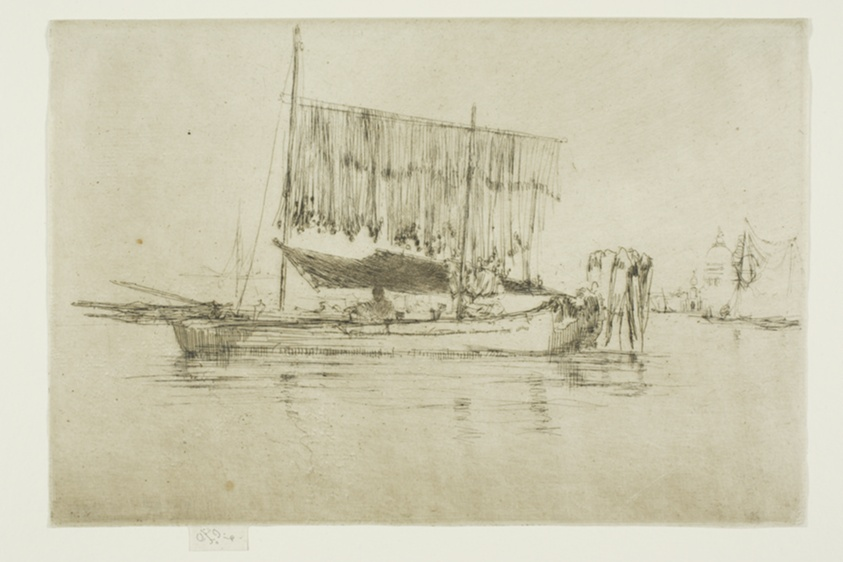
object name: Print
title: The Fishing Boat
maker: James McNeill Whistler (American, 1834-1903)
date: 1879/80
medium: Etching and drypoint with foul biting in dark brown ink on ivory laid paper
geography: United States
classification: etching; foul biting; print; prints and drawing; drypoint; paper